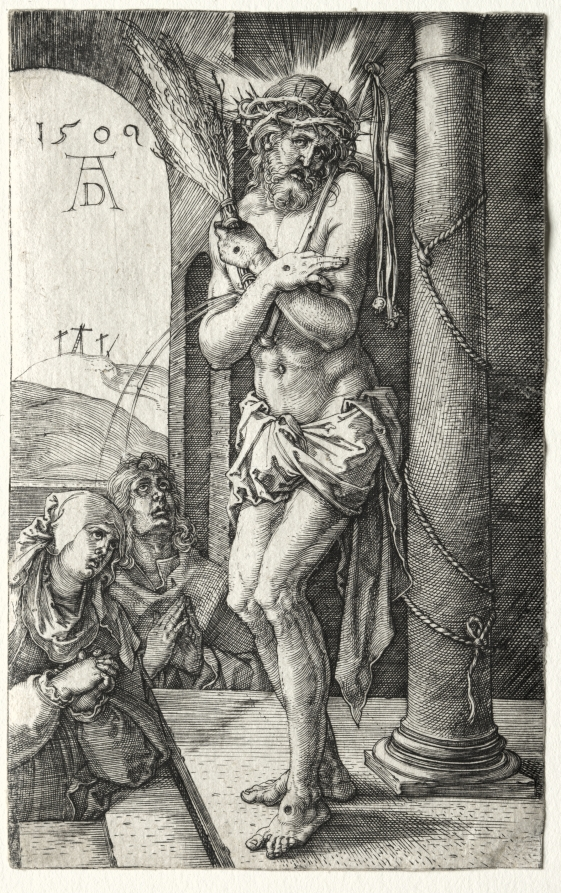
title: Man of Sorrows by the Column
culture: Germany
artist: Albrecht Dürer (German, 1471–1528)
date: 1509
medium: engraving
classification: Print